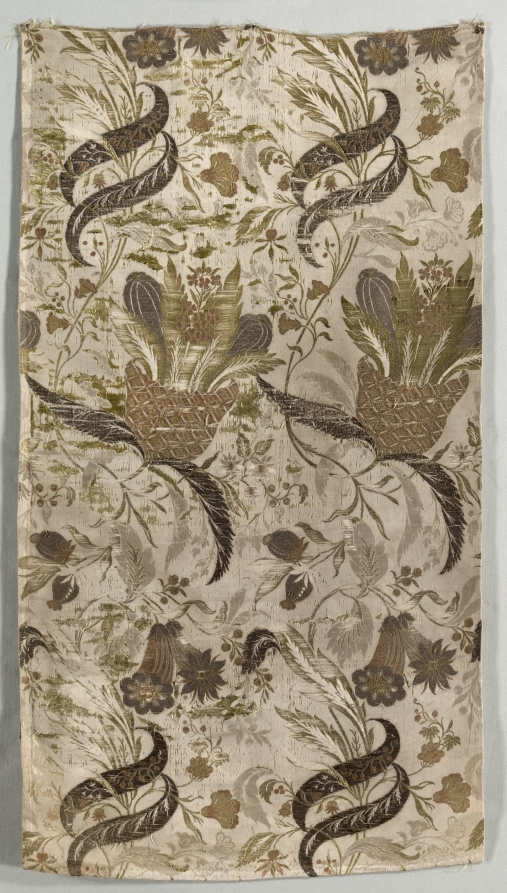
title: Large Floral Motif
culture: France, 19th century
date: 1830–1899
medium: plain compound satin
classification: Textile